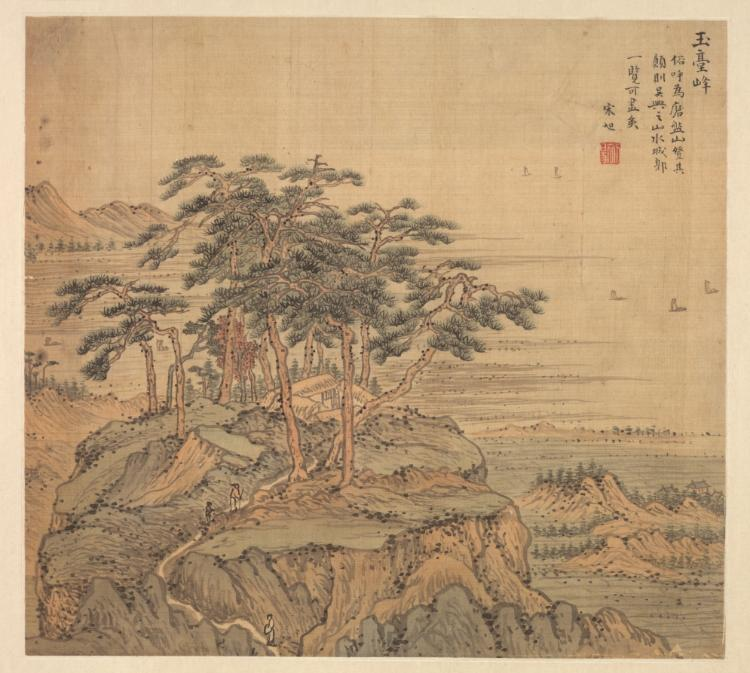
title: Yutai Peak (Jade Terrace Peak)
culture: China, Jiaxing, Ming dynasty (1368–1644)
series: Eighteen Views of Huzhou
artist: Song Xu (Chinese, 1525-c. 1606)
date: c. 1588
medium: Album leaf; ink and color on silk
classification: Painting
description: By the 1500s, visits to historic and scenic sites in the lower Yangzi delta stimulated an increase of printed illustrated travel books. Topographical depictions of local scenery flourished. Leaves from this album illustrates sites around Lake Tai of the two adjacent counties Changxing and Wuxing (modern Huzhou). Song Xu, who lived intermittently in Jiaxing and Songjiang, must have passed through Wuxing by boat and thus knew the region. The paintings are inscribed with gazetteerlike notations, suggesting that the album was produced for clients as commemorative works, a travel guide, or for “armchair travel” (woyou) in one’s mind.